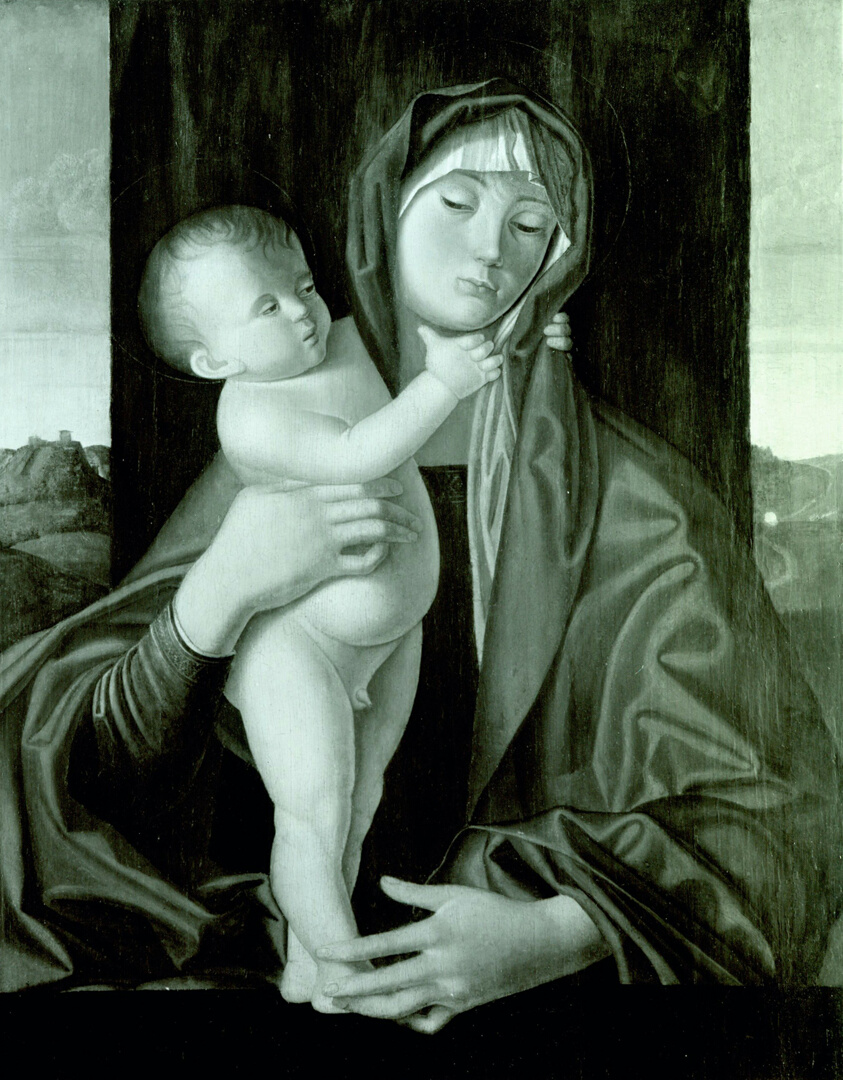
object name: Painting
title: Virgin and Child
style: 16th Century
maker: After Giovanni Bellini (Italian, 1428/30–1516)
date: 16th century or later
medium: Tempera or oil on panel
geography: Italy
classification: european painting; painting; oil on panel; Italian; paint; tempera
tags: Virgin and child/Madonna and child, children, Christian subjects, Christianity, female, religion, Virgin Mary, woman, Century of Progress, world's fairs, Chicago World's Fairs